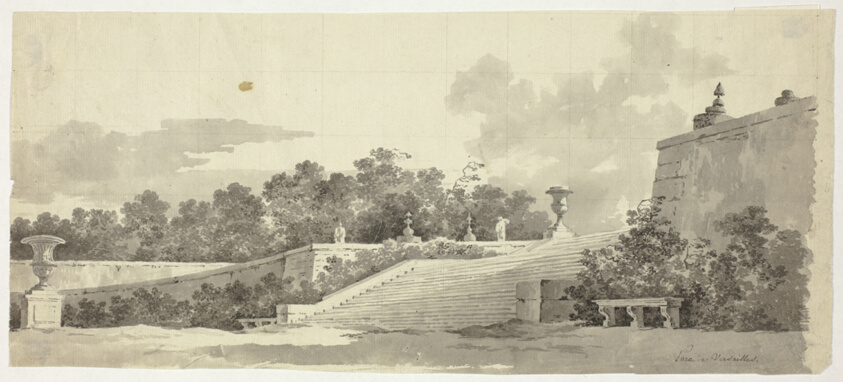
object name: Drawing and Watercolor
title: View of the Park at Versailles: Staircase, Urns and Topiaries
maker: Pierre Antoine Mongin (French, 1761/62-1824/27)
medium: Brush and gray wash, over graphite, on cream laid paper, squared in graphite for transfer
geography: France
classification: ink or chalk wash; drawings (visual works); prints and drawing